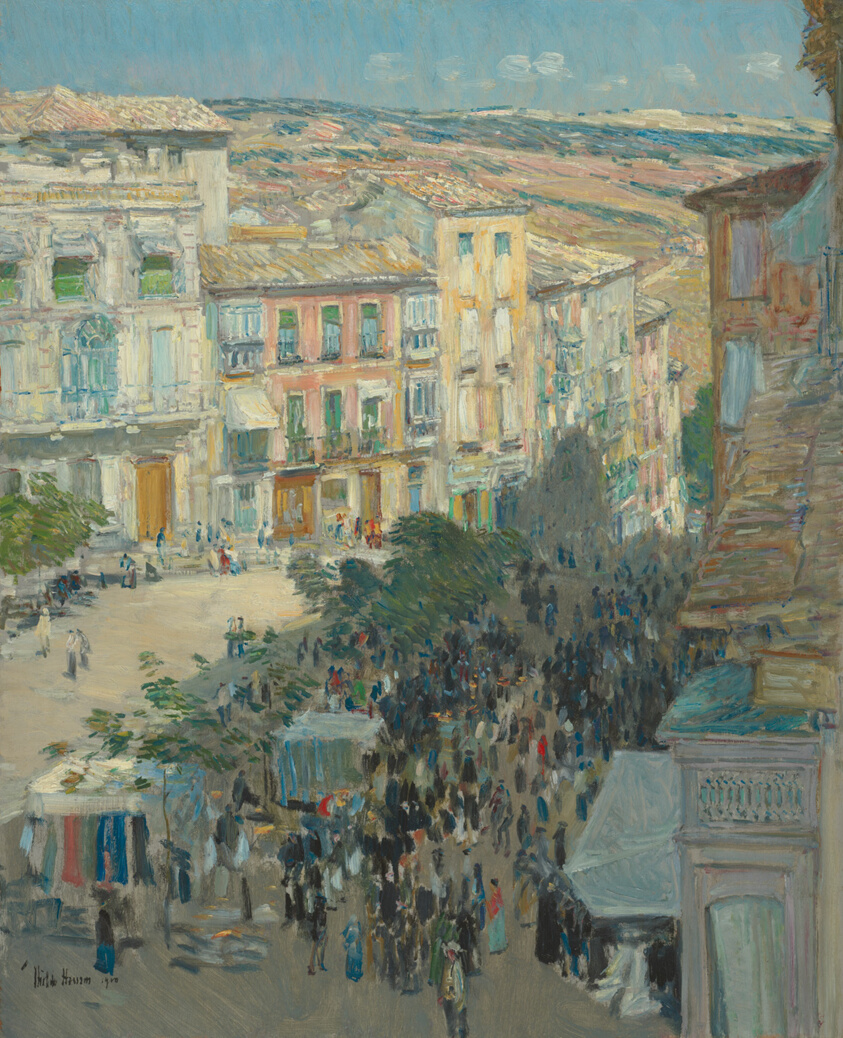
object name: Painting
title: El Zocodover, Toledo, Spain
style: Impressionism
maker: Childe Hassam (American, 1859–1935)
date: 1910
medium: Oil on board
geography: United States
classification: painting; modern and contemporary art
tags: cityscapes